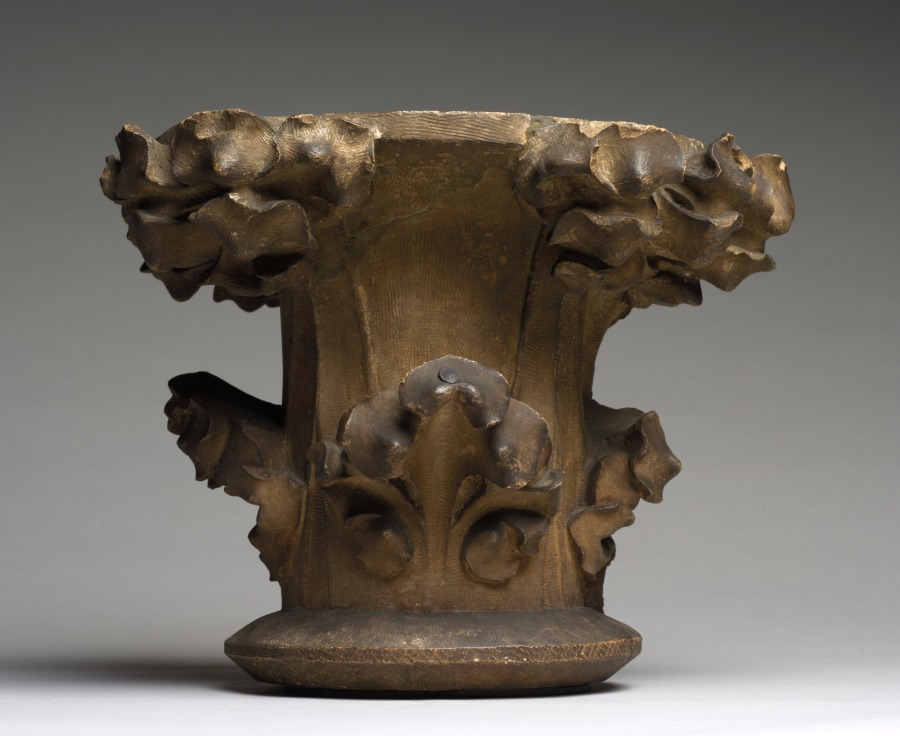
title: Column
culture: France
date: 1200s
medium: stone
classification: Sculpture